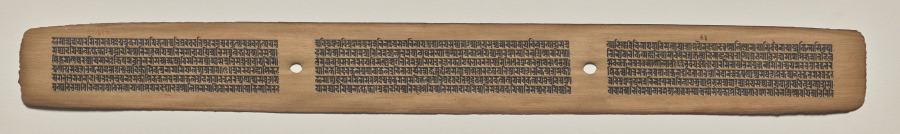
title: Text, folio 43 (recto), from a Manuscript of the Perfection of Wisdom in Eight Thousand Lines (Ashtasahasrika Prajnaparamita-sutra)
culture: Eastern India, Bihar, Vikramashila Monastery. Painting: Nepal, Kathmandu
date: Sunday, September 14, 1119 (year 239 of the Newar Samvat in the month of Ashvina)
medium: gum tempera and ink on palm leaves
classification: Painting